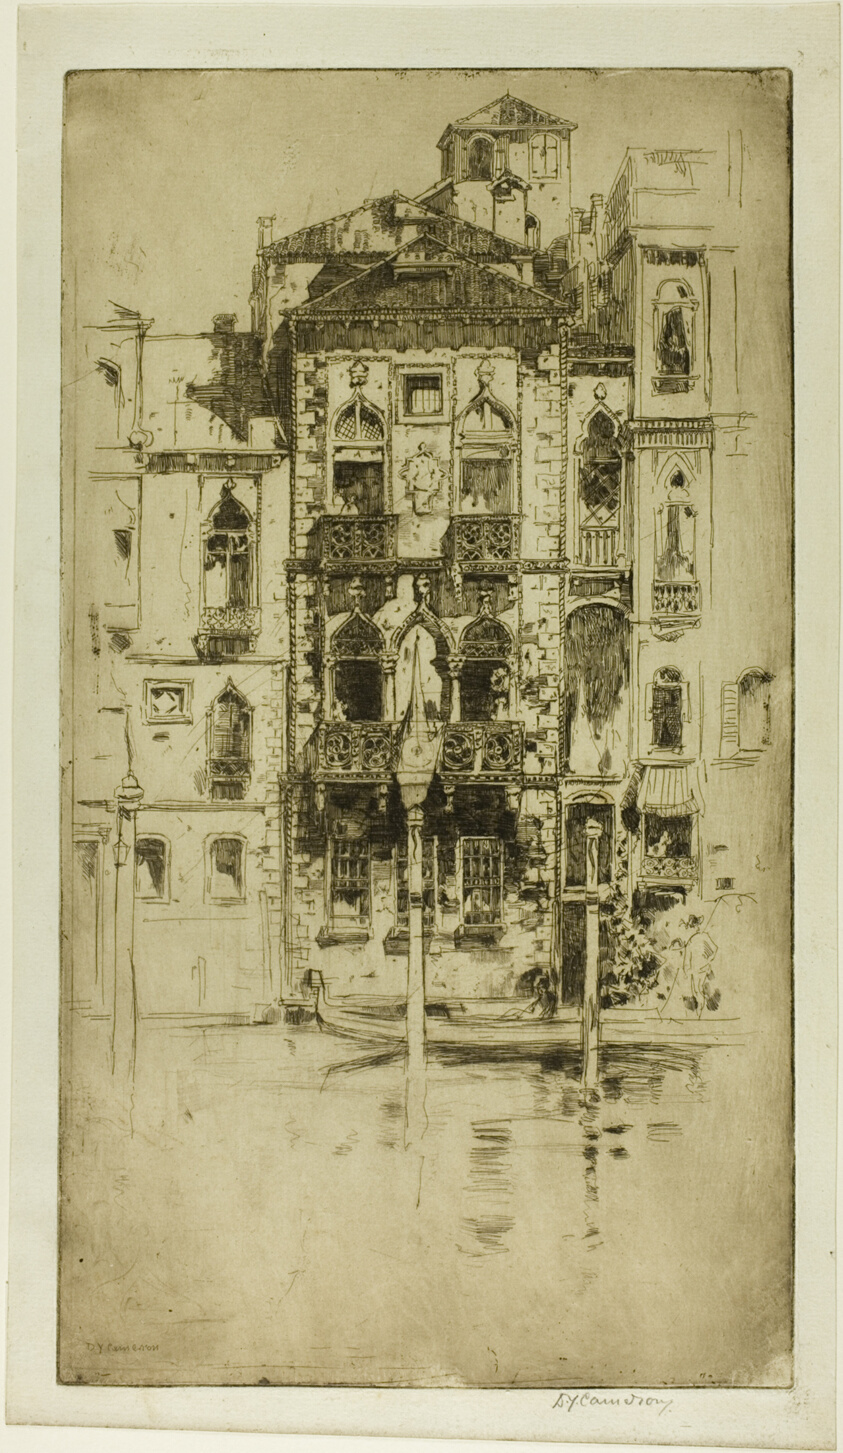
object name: Print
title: A Venetian Palace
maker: David Young Cameron (Scottish, 1865-1945)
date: 1898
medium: Etching on ivory laid paper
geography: Scotland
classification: etching; print; prints and drawing